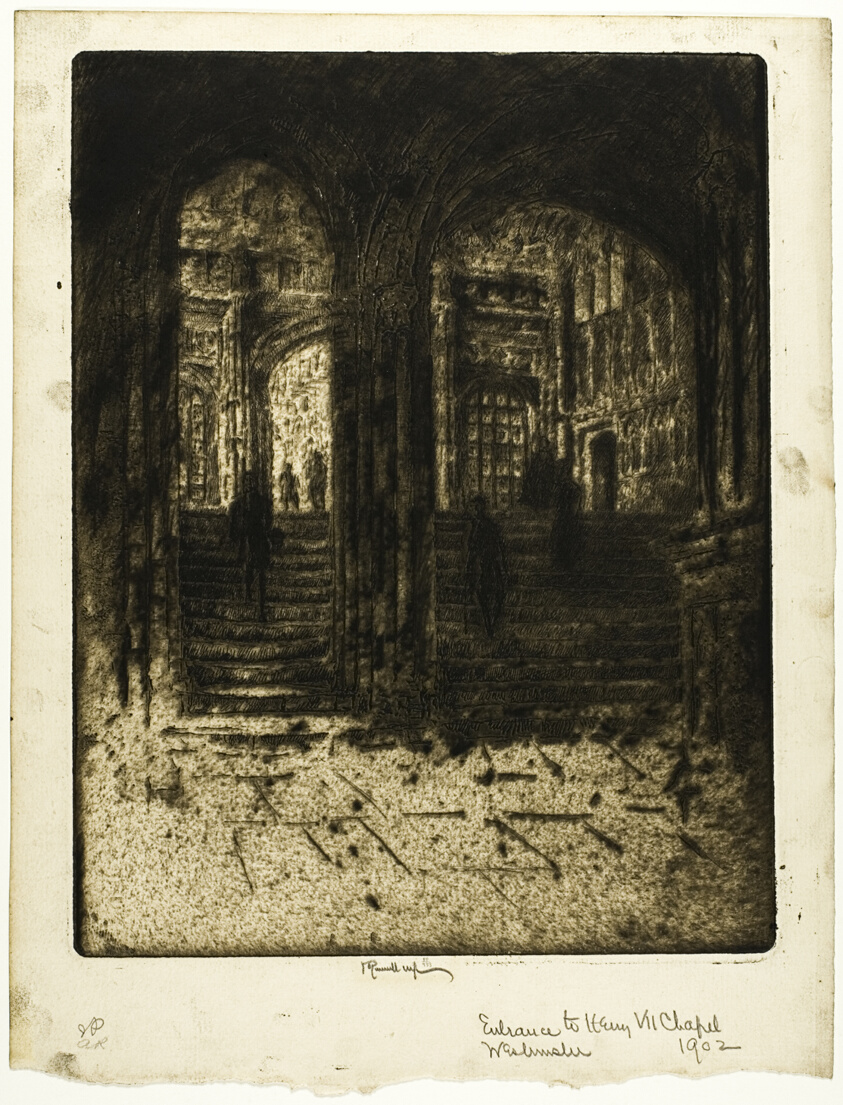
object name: Print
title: Entrance to Henry VII's Chapel, Westminster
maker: Joseph Pennell (American, 1857-1926)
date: 1905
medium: Etching in dark black on ivory laid paper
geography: United States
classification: etching; print; prints and drawing